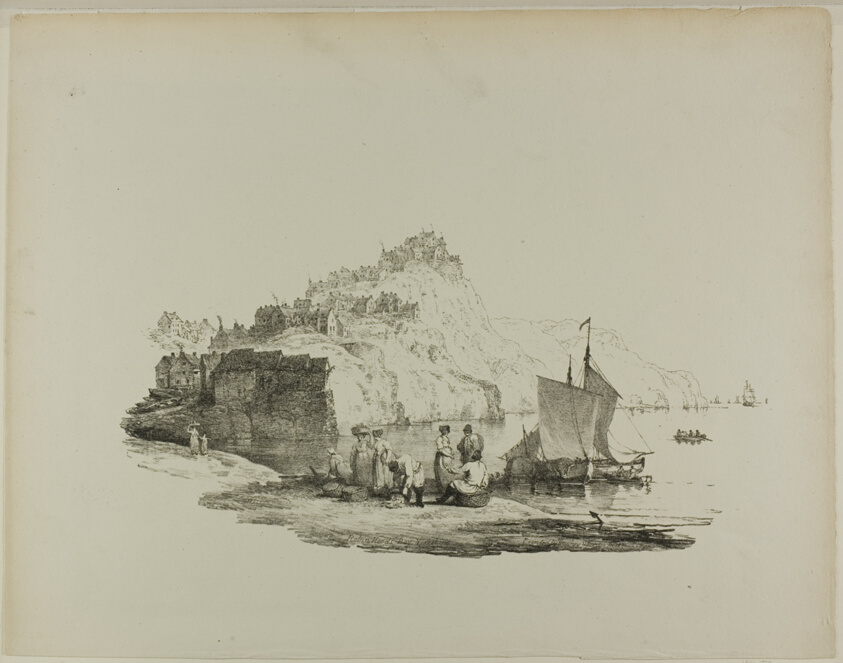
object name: Print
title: Robin Hood's Bay, Yorkshire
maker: Francis Nicholson (English, 1753-1844)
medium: Lithograph on paper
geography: England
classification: lithograph; print; prints and drawing